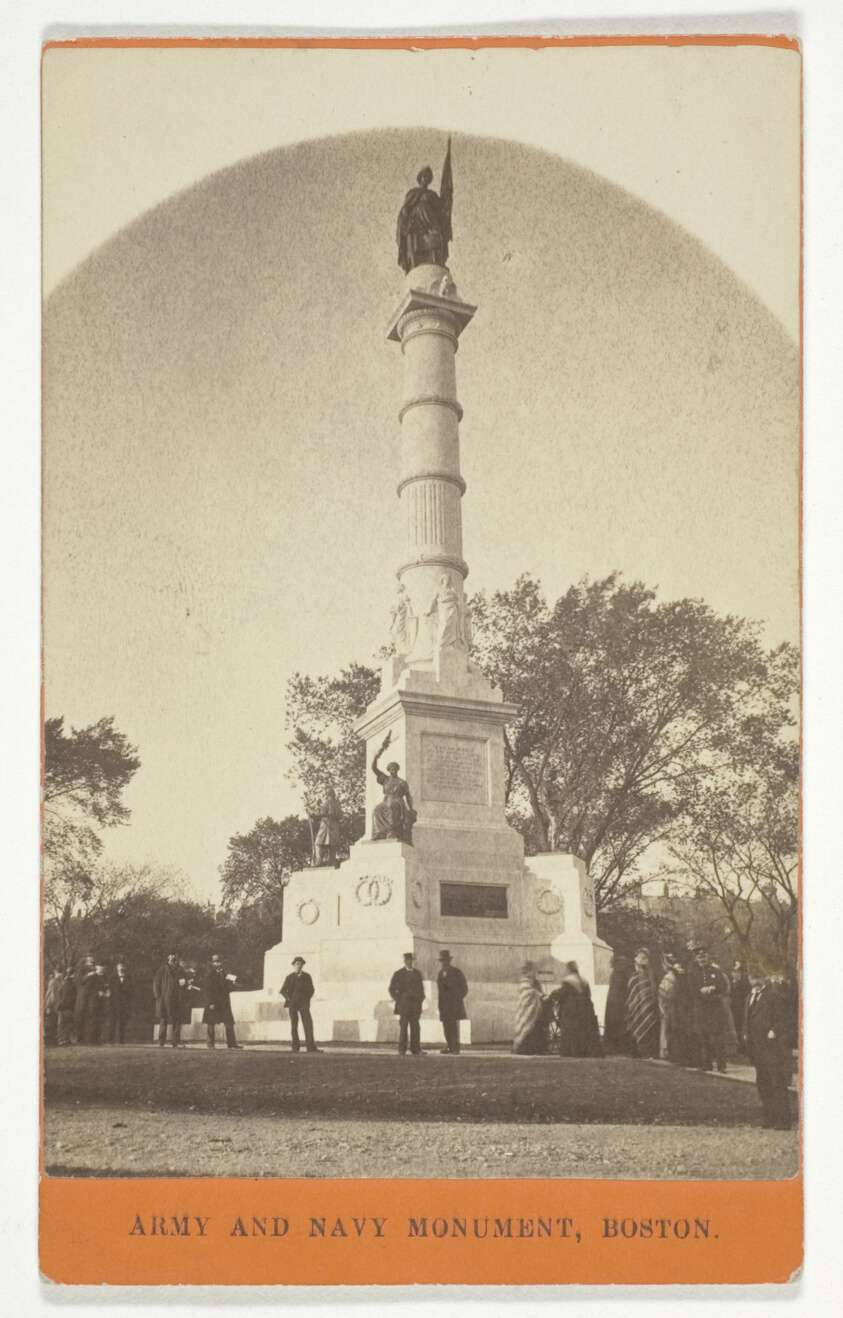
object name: Photograph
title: Army and Navy Monument, Boston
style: 19th century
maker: Artist unknown; American, 19th century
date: 1840/1900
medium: Albumen print (carte-de-visite)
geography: United States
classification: carte-de-visite (albumen); photographic process; photography; card photographs; photograph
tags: Collected by Hugh Edwards